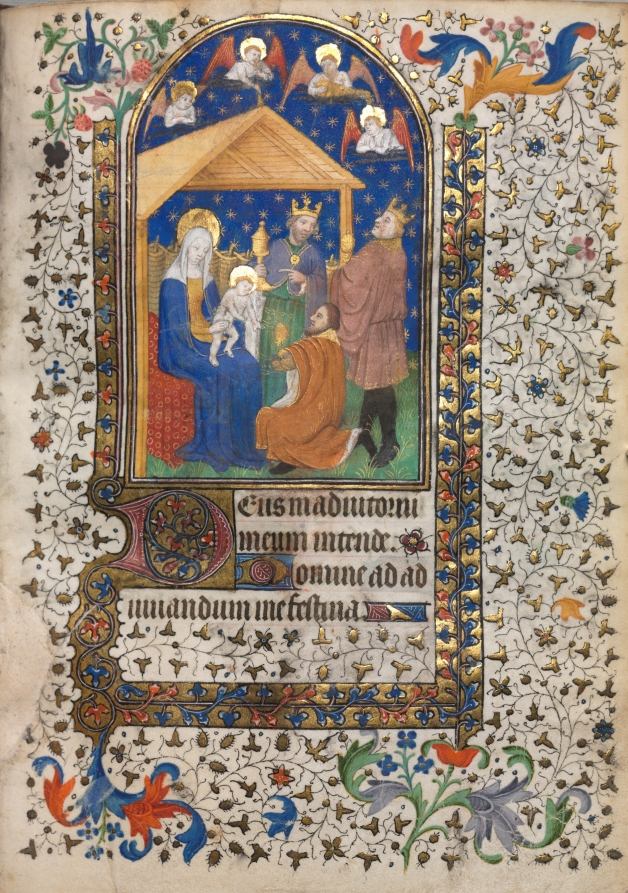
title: Book of Hours (Use of Paris): Adoration of the Magi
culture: France, Paris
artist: follower of Boucicaut Master (French, Paris, active about 1410–25)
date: c. 1420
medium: ink, tempera, and gold on vellum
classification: Bound Volume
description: The Guise Master-named after the book of hours he illustrated for François de Lorraine, Duke of Guise-developed his style from the more dominant Parisian workshop of the Boucicaut Master.